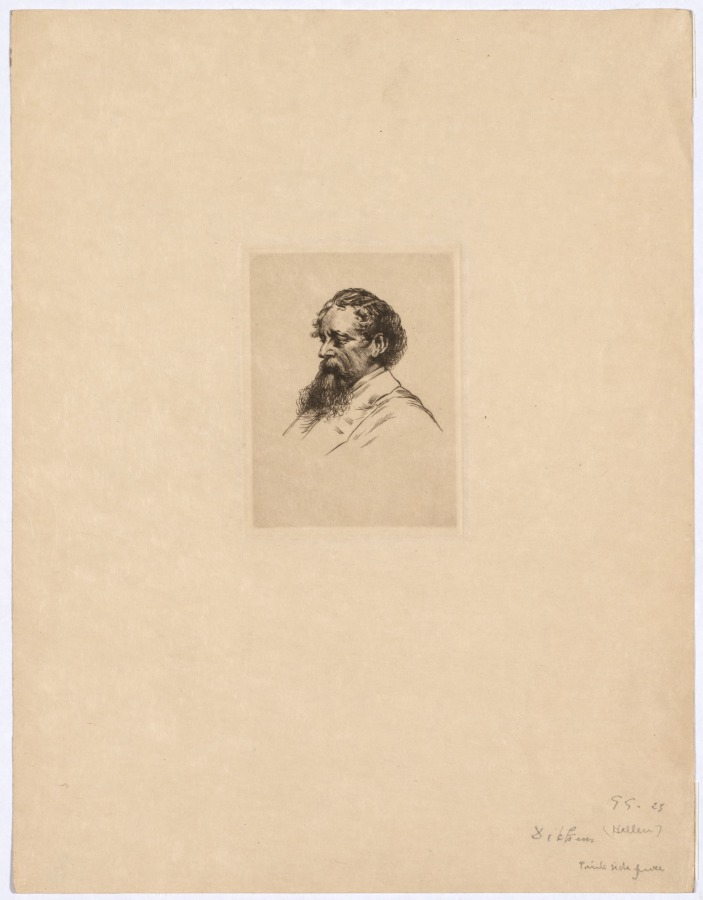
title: Portrait of Charles Dickens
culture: France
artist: Georges Gorvel (French, 1866–1938)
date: c. 1929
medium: Drypoint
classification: Print